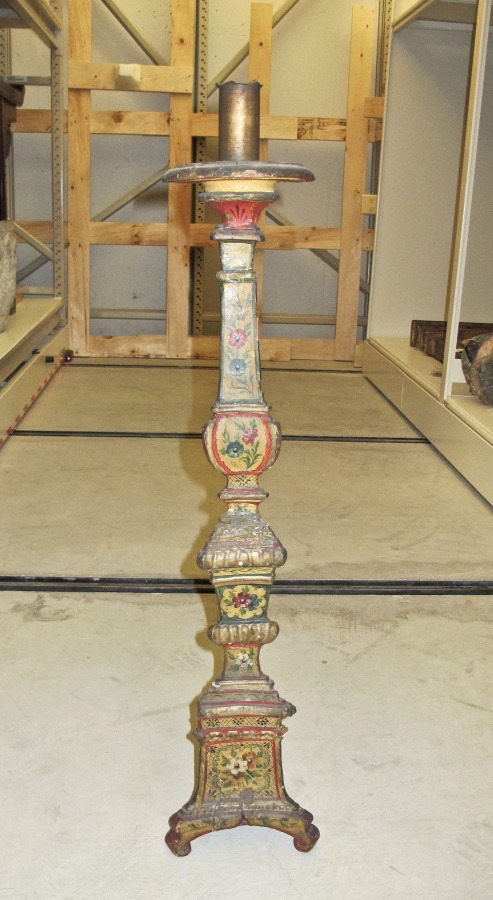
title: Pair of Candleholders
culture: Italy, Florence, 18th century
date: 1700s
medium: carved and painted wood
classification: Furniture and woodwork